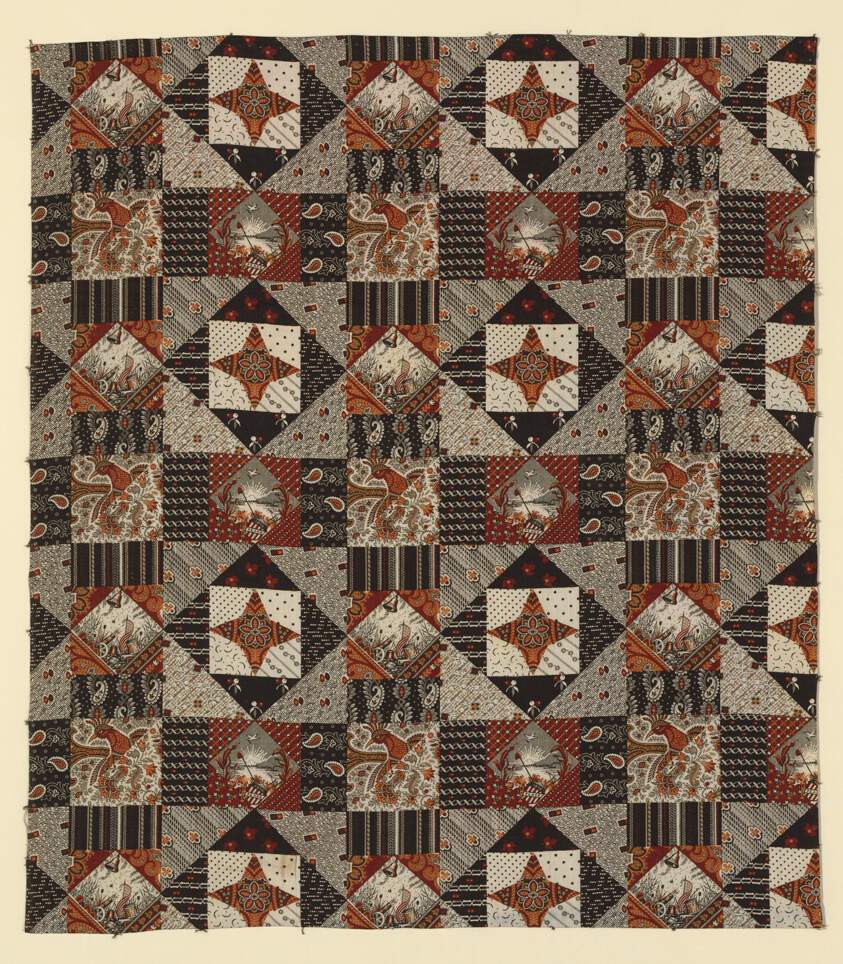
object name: Textile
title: Centennial Print (Furnishing Fabric)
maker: Manufactured by Cocheco Cotton Manufacturing Company (American, founded 1812); United States, New Hampshire, East Rochester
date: c. 1875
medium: Cotton, plain weave; roller printed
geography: New Hampshire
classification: textile; weaving - printed; furnishing textile